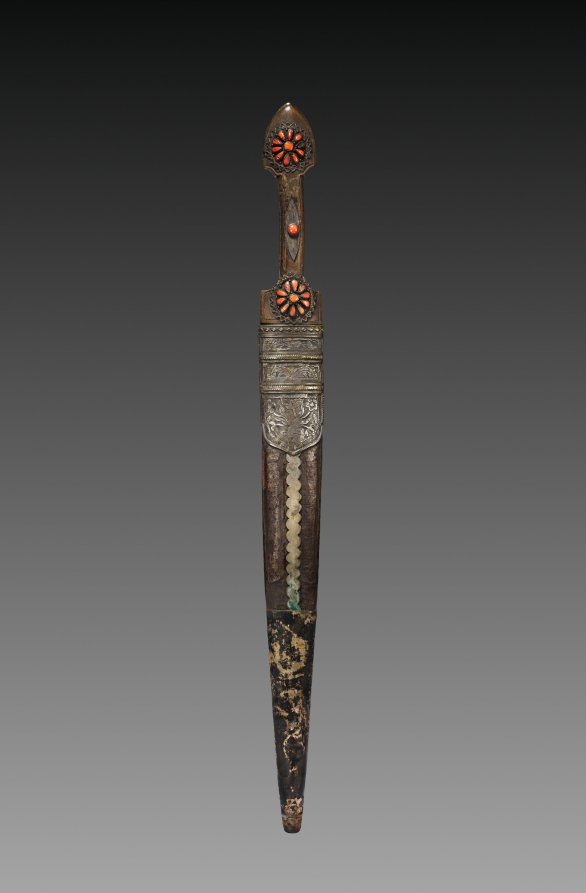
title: Dagger (Khanjali) with Scabbard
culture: Transcaucasian, Georgian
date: 1700s–1800s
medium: carnelian?, steel, wood handle, copper alloy, and silver gilt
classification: Arms and Armor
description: A khanjali is a dagger popular with the inhabitants of Georgia and the rest of the Caucasus since ancient times. They often have a single offset groove on each face of the blade and the shape is similar to the ancient Roman gladius and the Scottish dirk.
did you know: Scabbards for daggers like these are usually highly engraved with gold or silver designs and can sometimes include embedded gemstones.